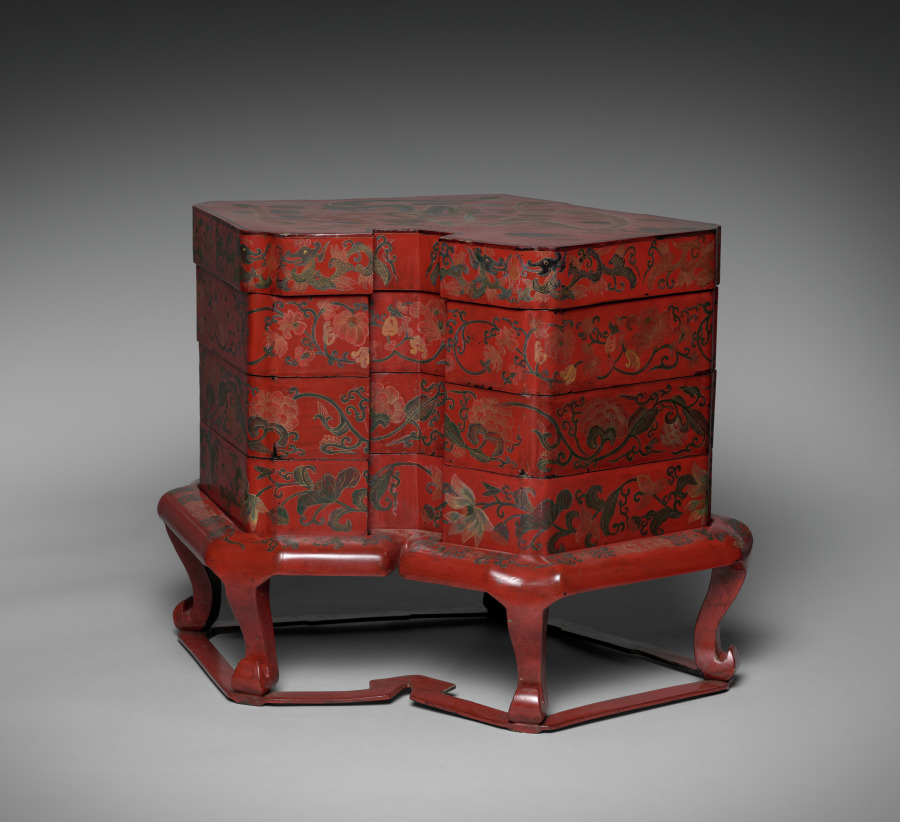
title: Tiered Food Box with Stand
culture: Japan, Edo period (1615–1868)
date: late 1700s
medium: red lacquer over a wood core, with litharge painting and engraved gold designs (Ryukyuan)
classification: Lacquer